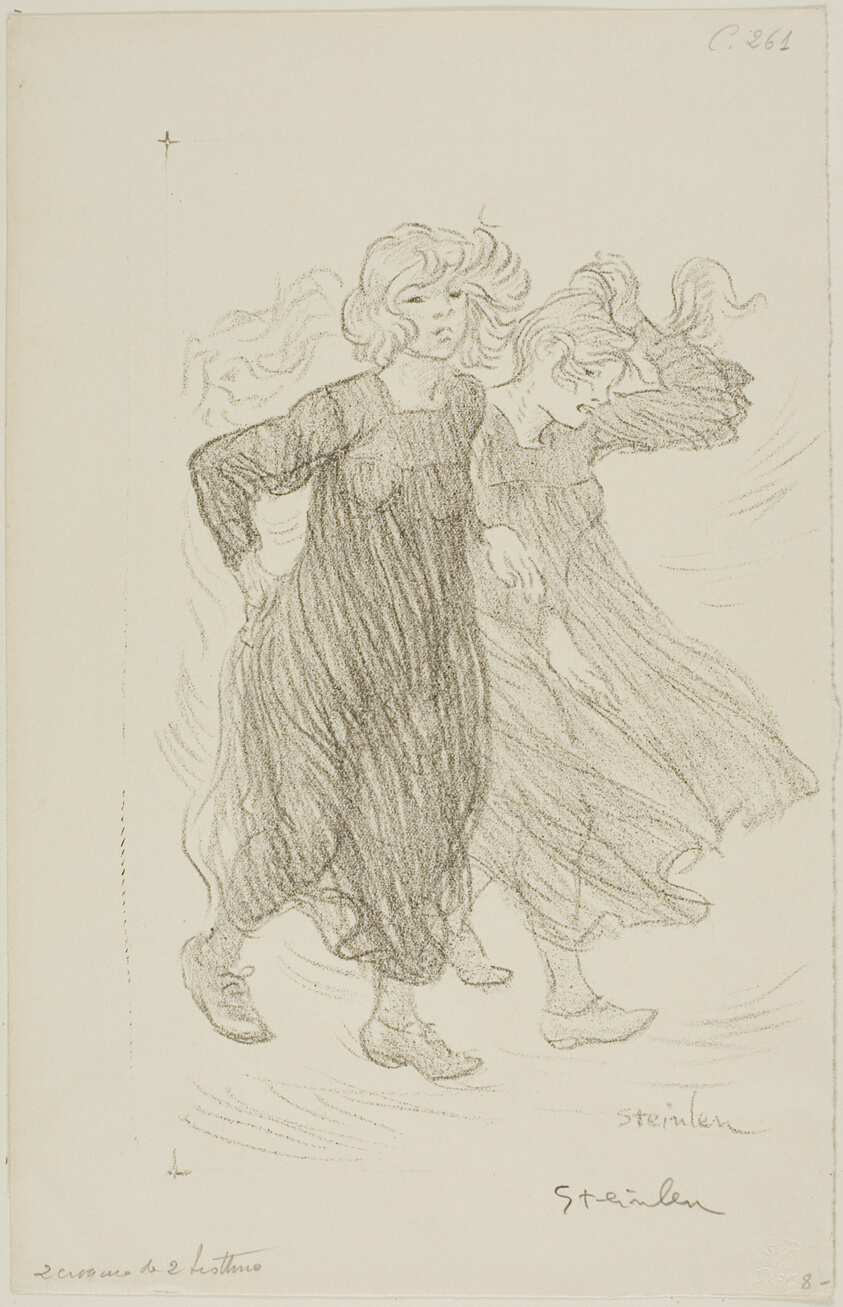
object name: Print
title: Gust of wind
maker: Théophile-Alexandre Steinlen; French, born Switzerland, 1859-1923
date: February 1905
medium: Lithograph in black on ivory wove paper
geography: France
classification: lithograph; print; prints and drawing